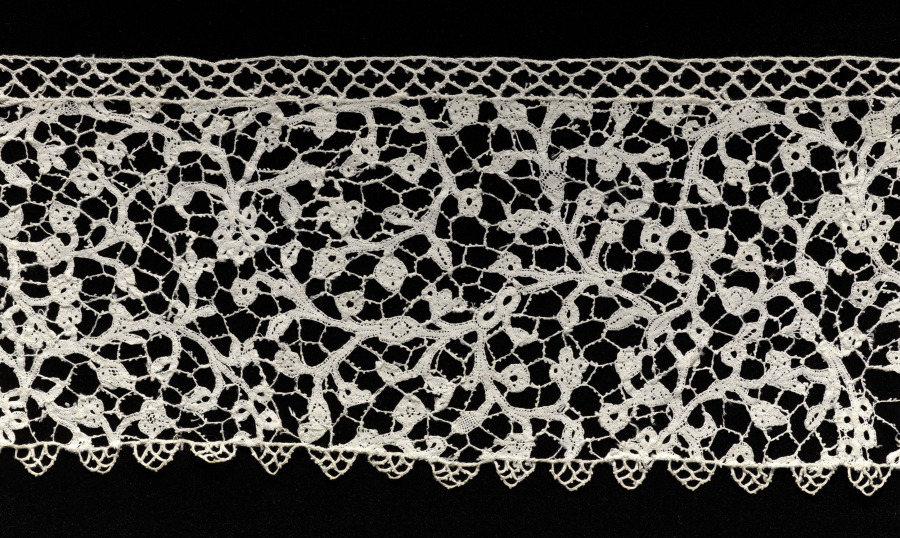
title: Lace Border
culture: Italy, Milan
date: 1600s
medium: Linen: bobbin lace (bride ground)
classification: Lace